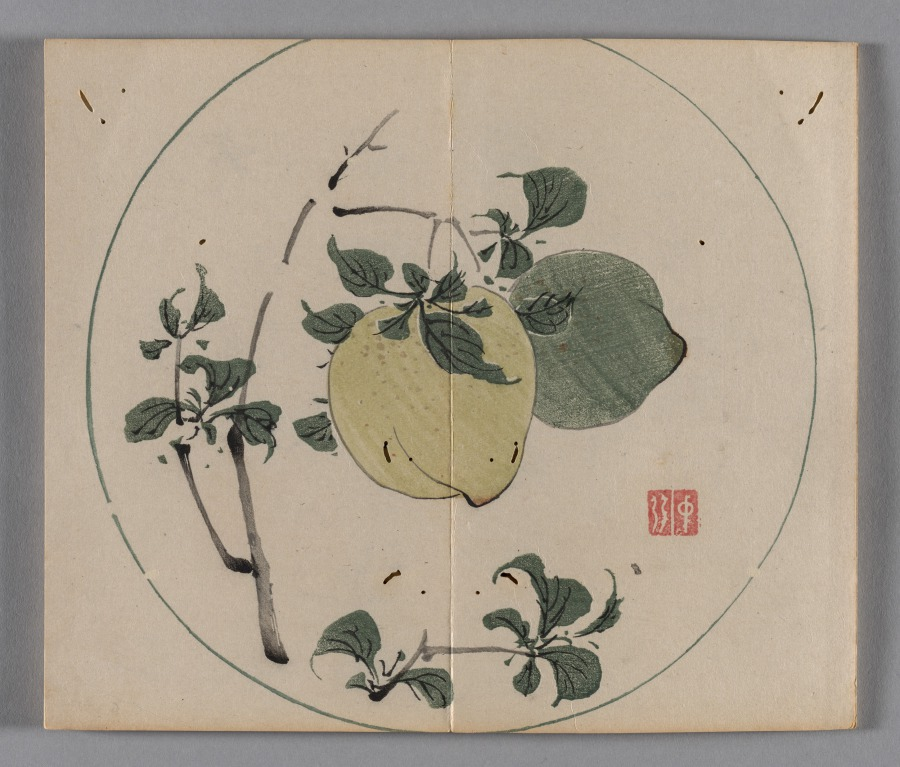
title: Ten Bamboo Studio Painting and Calligraphy Handbook (Shizhuzhai shuhua pu): Round Fans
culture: China, Qing dynasty (1644-1911)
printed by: Hu Zhengyan (Chinese, c. 1584–1674)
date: 1633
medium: Woodblock-printed book; ink and colors on paper; first edition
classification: Print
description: Color printing reached a level of perfection in the early 1600s, as seen in this Ten Bamboo Studio Collection of Calligraphy and Painting and the Mustard Seed Garden Manual of Painting (printed 1679 and 1701). The painterly quality, precision in registering (aligning) the woodblocks, and harmonious colors made them the most successful color print editions in Chinese history. Both editions were printed and compiled in Nanjing, spread nationwide, and had a great impact on the arts in Japan and Korea.